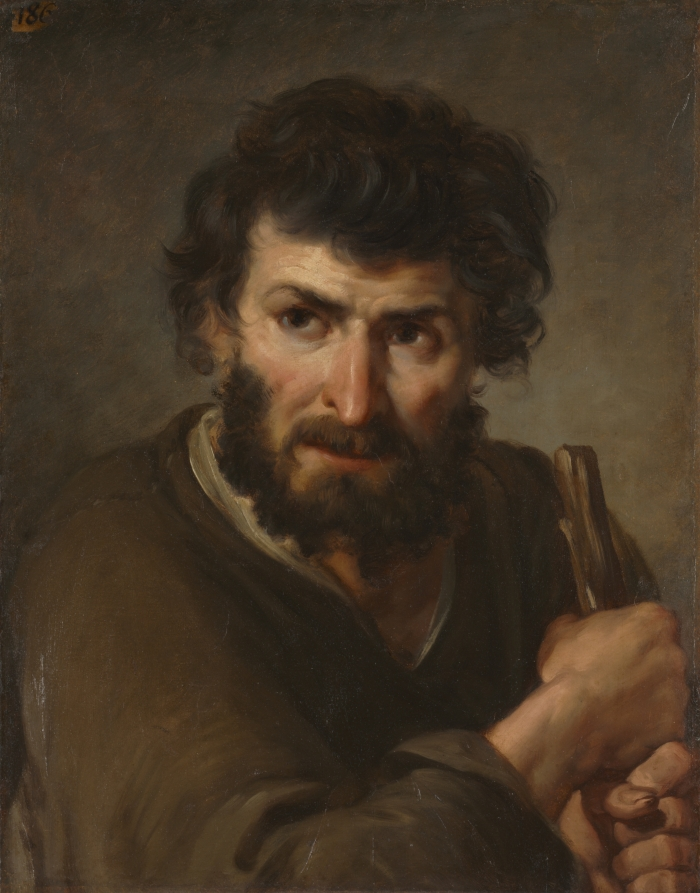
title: Study of a Shepherd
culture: France, 18th century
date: 1700s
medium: oil on paper, mounted on board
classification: Painting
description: The attribution of this unsigned painting remains unsettled and may be by a French or Italian artist. Among the names proposed have been Joseph-Marie Vien the Elder and Hugues Taraval.